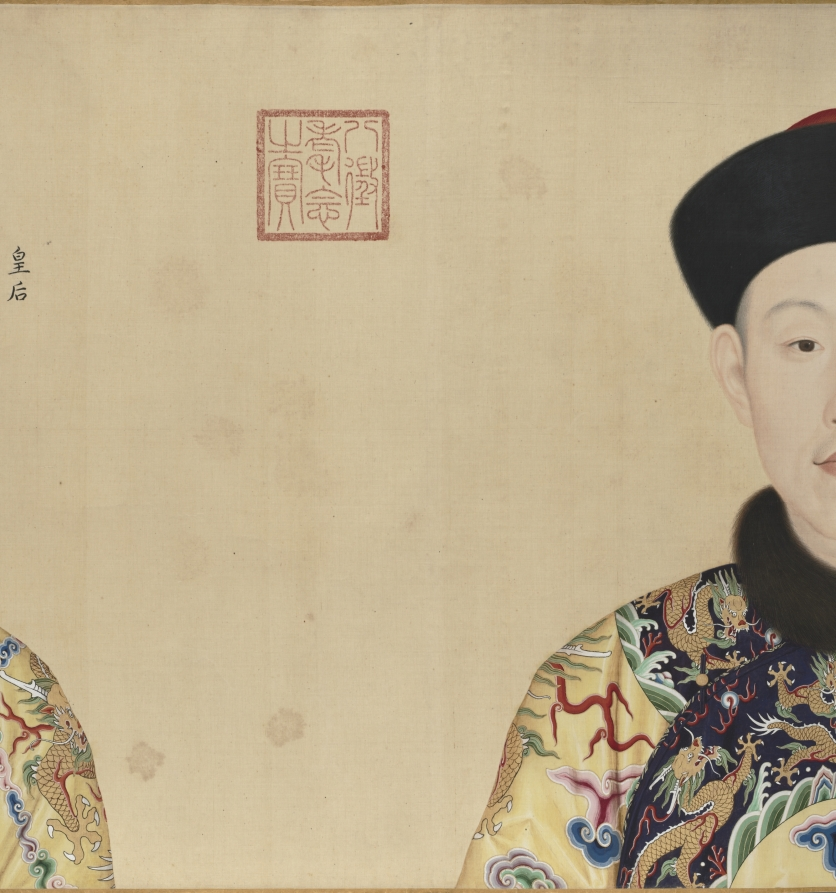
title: Portraits of the Qianlong Emperor and His Twelve Consorts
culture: China, Qing dynasty (1644–1911), Qianlong reign (1736–95)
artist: Giuseppe Castiglione (Italian, 1688–1766)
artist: and others (Chinese)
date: 1736–70s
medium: Handscroll; ink and color on silk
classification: Painting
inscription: 9 seals of the Qianlong emperor (r. 1736–95).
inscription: The eighth month, first year of Qianlong [1736] 乾隆元年八月吉日. The Empress (Xiaoxian) 皇后 (1712–1748), The Guifei (Huixian) 貴妃 (?-–1745), Chunfei 純妃 (1713–1760), Jiafei 嘉妃 (?–1755), Lingfei 令妃 (1727–1775), Shufei 舒妃 (1728–1777), Qingbin 慶嬪 (1724–1774), Yingbin 穎嬪 (1731–1800), Xinbin 忻嬪 (?–1764), Dunfei 惇妃 (1746–1806), Xunfei 順妃 (1749–1788), Shunbin 循嬪 (?–1797).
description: This portrait shows the Qianlong emperor at 26, in the first year of his reign. His likeness is followed by portraits of the empress and eleven consorts. Their portraits document the appearances of the court women around the time when they received their respective imperial titles, which occurred at different stages of the emperor's life. The first three portraits were done by the Jesuit (Roman Catholic) missionary artist Giuseppe Castiglione, whereas the later ones were by Chinese court painters. Formal portraiture contributed to the affirmation of status and construction of role and identity. This scroll served as both familial documentation and a "mind picture" of the Qianlong emperor, suggesting that his constructed image of emperorship was inseparable from concepts of self and family. It was stored in a carved red lacquer box bearing the original painting title Mind Picture of a Well-Governed and Tranquil Reign (see CMA 1969.32).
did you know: Lingfei 令妃 (1727–1775), the first consort depicted in the maroon or “incense-colored" 香色 robe, was the mother of six of Qianlong’s children, including the future Emperor Jiaqing.